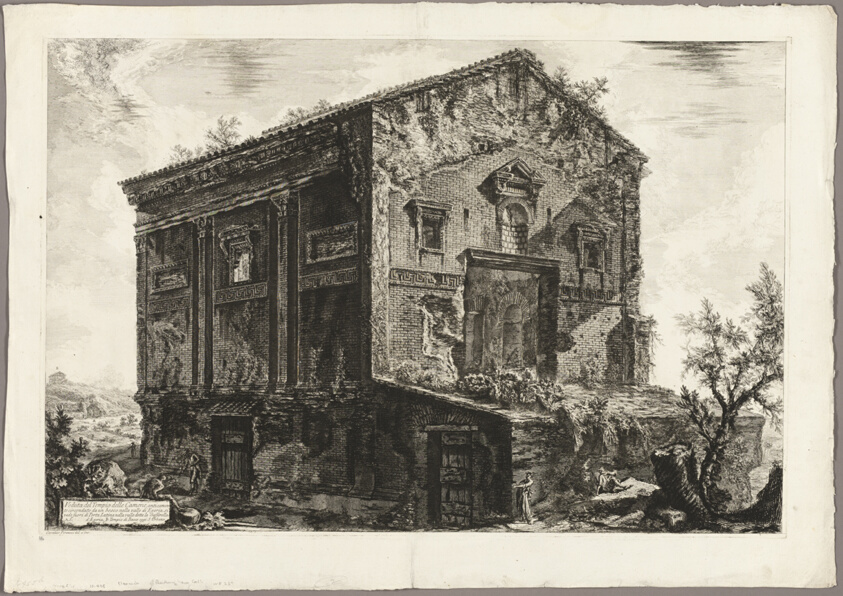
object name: Print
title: View of the Temple of the Camenae, from Views of Rome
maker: Giovanni Battista Piranesi (Italian, 1720-1778)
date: 1773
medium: Etching on heavy ivory laid paper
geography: Italy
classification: etching; print; prints and drawing